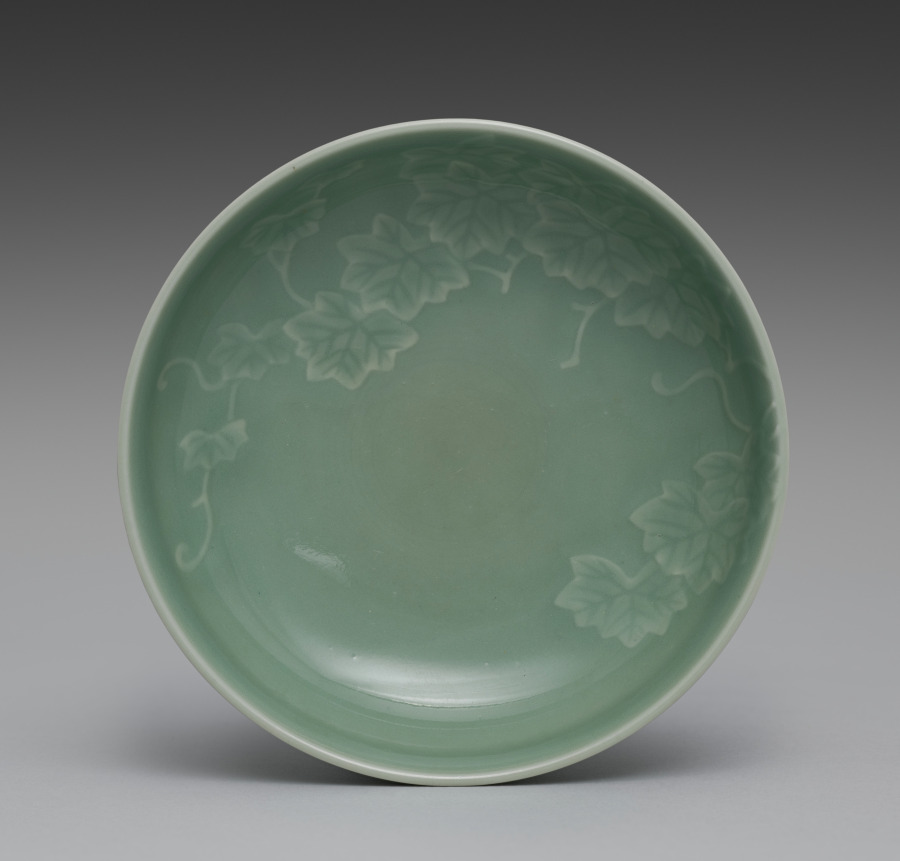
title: Dish from Dishes with Ivy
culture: Japan, Meiji period (1868–1912)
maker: Seifū Yohei III (Japanese, 1851–1914)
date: 1893–1914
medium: One from a set of five dishes; porcelain with green glaze and molded designs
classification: Ceramic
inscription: 清風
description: Yohei III’s main output for his sophisticated clientele was in the form of tea sets and dining sets. He often produced in pairs, sets of five, or sets of ten. This set of five dishes with a green glaze and designs of ivy vines in very low relief has unfortunately lost its box. These dishes are slightly larger than the other dishes, like CMA 2022.187, and so may have been not saucers but rather small plates for meals.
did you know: In his career, Seifū Yohei III created a range of dishes in green glazes.